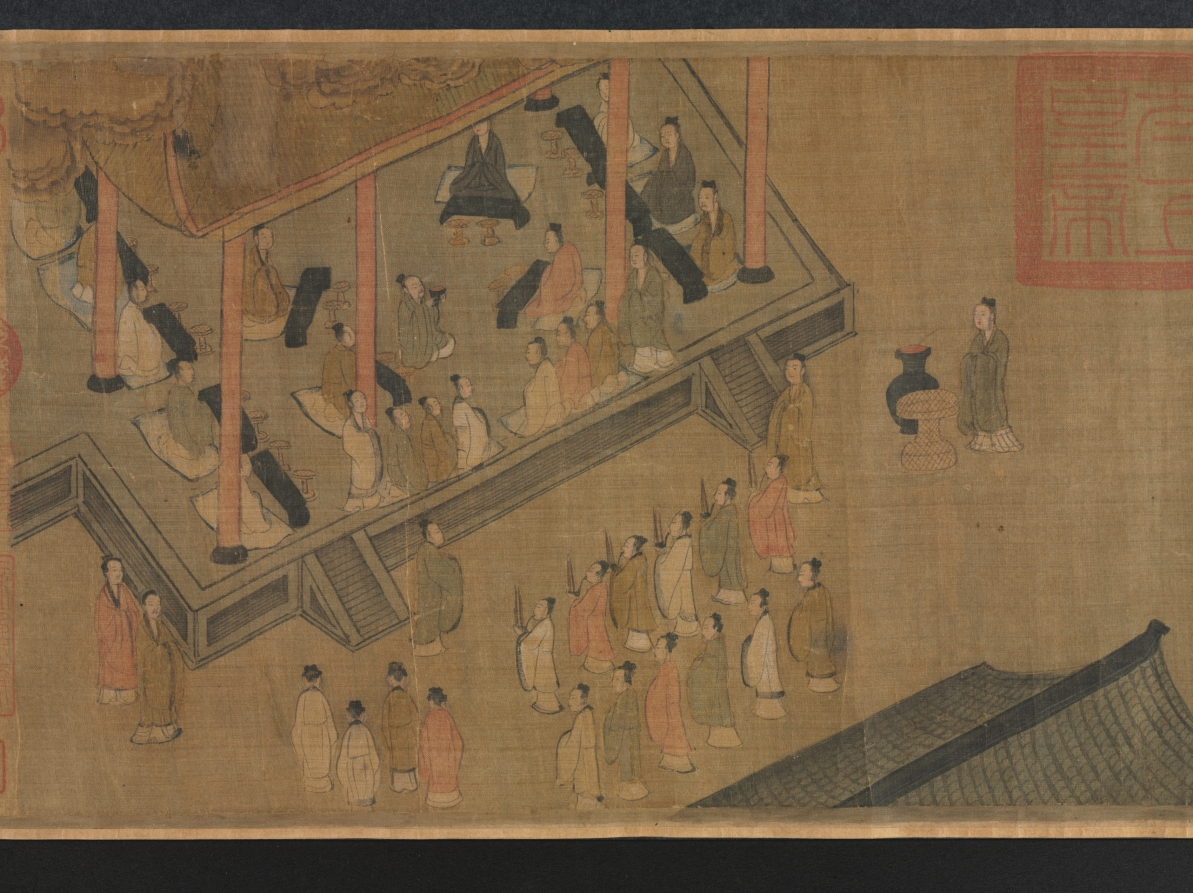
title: "Seventh Month" from the Odes of Bin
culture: China, Southern Song dynasty (1127-1279)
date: 1200s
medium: Handscroll; ink and color on silk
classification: Painting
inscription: Colophons: 1. [on the frontispiece] by the Qianlong emperor (dated 1741). 2. by Lu Wan (dated Zhengde dingchou, 1517). 2. by the Jiaqing emperor (dated 1807).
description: According to Confucian thought, the ruler looks after the well-being of his people which involves agricultural activities. Seventh Month from the ancient Odes of Bin in the Shijing (Book of Poetry) describes occupations throughout the year, including plowing, harvesting, hunting, making clothes, and observing rituals. The earliest illustrations of these Odes accompanied by text were commissioned by Southern Song emperor Gaozong (reigned 1127–1162). As the lower Yangzi delta had become the new seat of government, Gaozong had sets of these illustrations produced by court artists to revive the dynasty and convince the Confucian officialelite of his legitimacy to rule.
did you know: The Odes of Bin appears in the classic Shijing (Book of Poetry), an anthology of more than 300 poems, folk songs, and ceremonial hymns that were originally chanted to music.